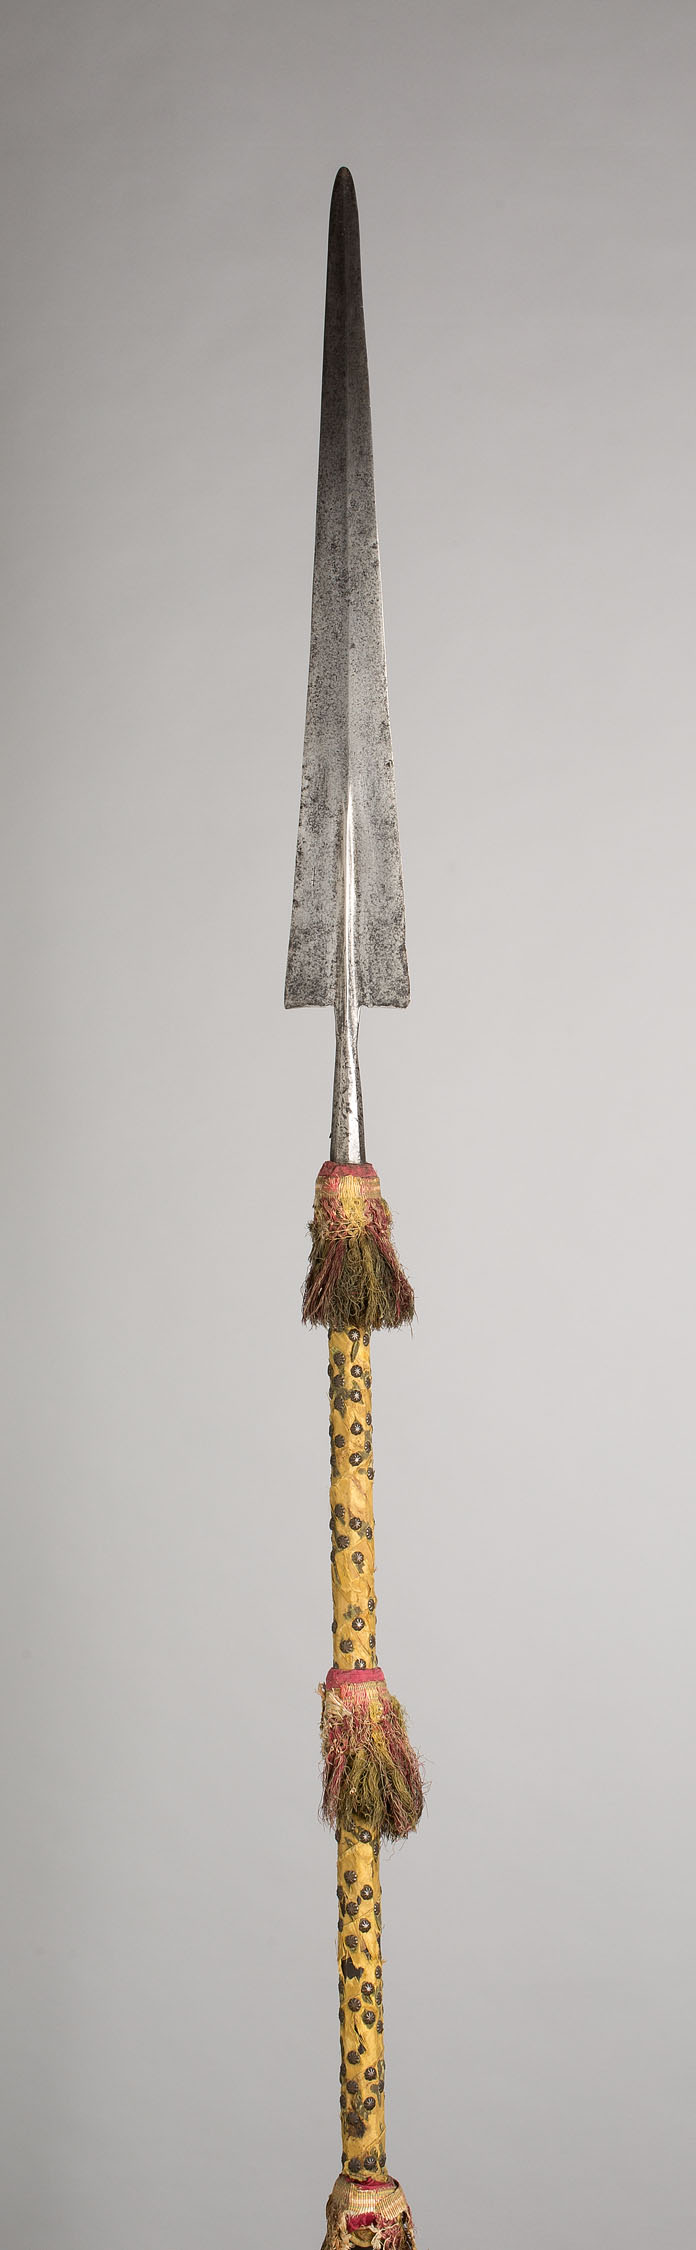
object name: Arms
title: Langebeve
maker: Italian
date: 1530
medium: Steel, wood (oak), silk, and brass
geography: Italy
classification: edged weapon-staff; arms; arms and armor